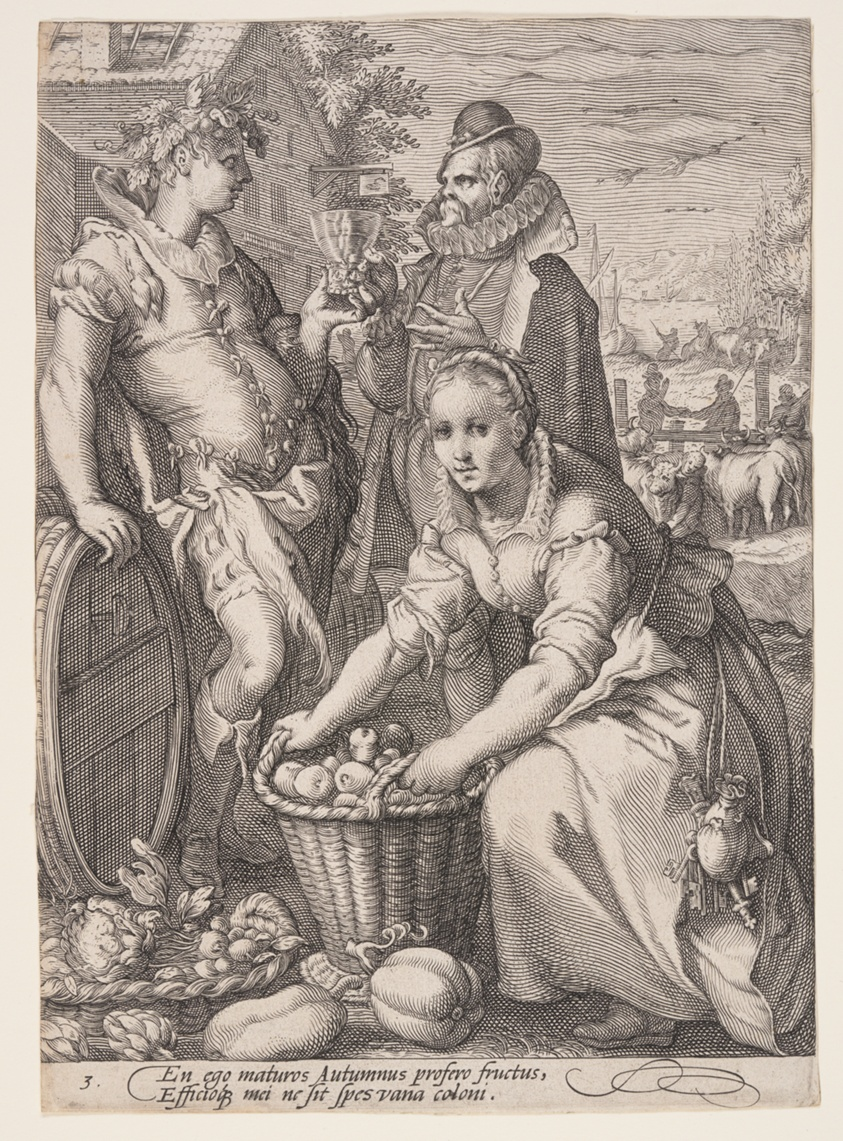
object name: Print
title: Autumn (Harvesting and Wine Tasting), from The Four Seasons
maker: Attributed to Jan Saenredam (Dutch, 1565–1607); after Hendrick Goltzius (Dutch, 1558–1617)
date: c. 1595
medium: Engraving on laid paper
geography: Netherlands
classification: print; engraving; paper; prints and drawing